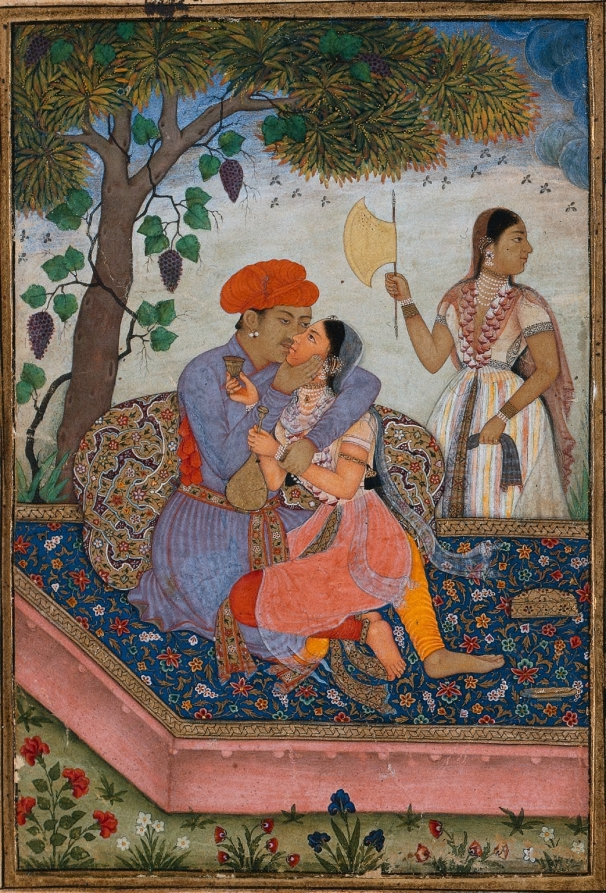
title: Lovers Embracing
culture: Mughal India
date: c. 1630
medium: Gum tempera and gold on paper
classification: Painting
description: The twining and coiling of the patterns on the carpet and large floor cushion mirror the interlaced bodies of the amorous couple. The clinging grapevine also references the wine they share from one cup. Such a carpet was not to be walked on, so the lovers do not wear shoes. It provides a luxurious furnishing to the intimate outdoor space. Here, the floral patterns evoke the pleasures of paradise. The textile patterns have been rendered with such precision that they appear like colorful enamel work or inlaid jewels. A covered golden box at right contains aromatic betel nut treats (paan) that freshen the breath.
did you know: Erotic metaphors in visual poetry: bees fly to blossoms as rain clouds approach.